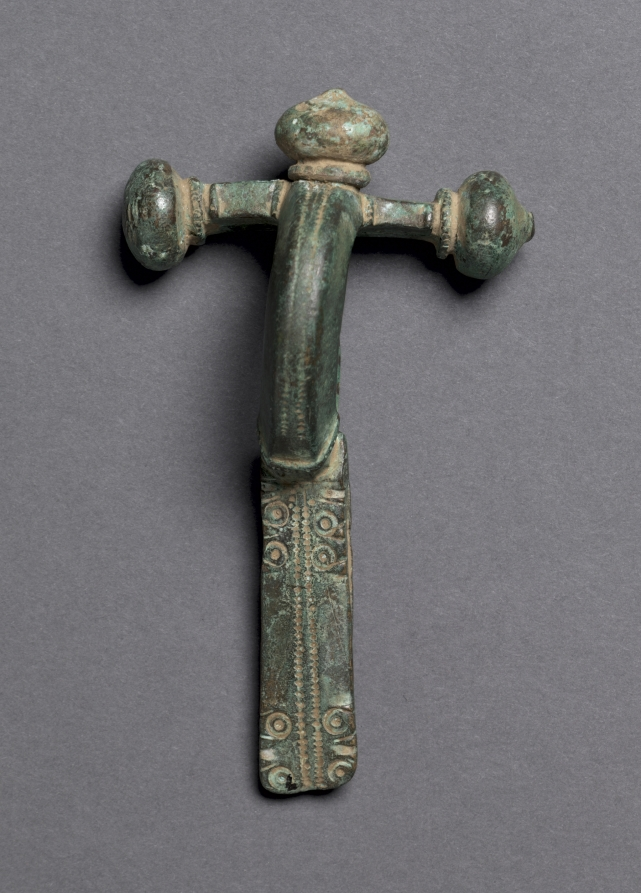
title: Cross-bow Fibula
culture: Italy, Roman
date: 1–200 CE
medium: bronze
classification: Jewelry